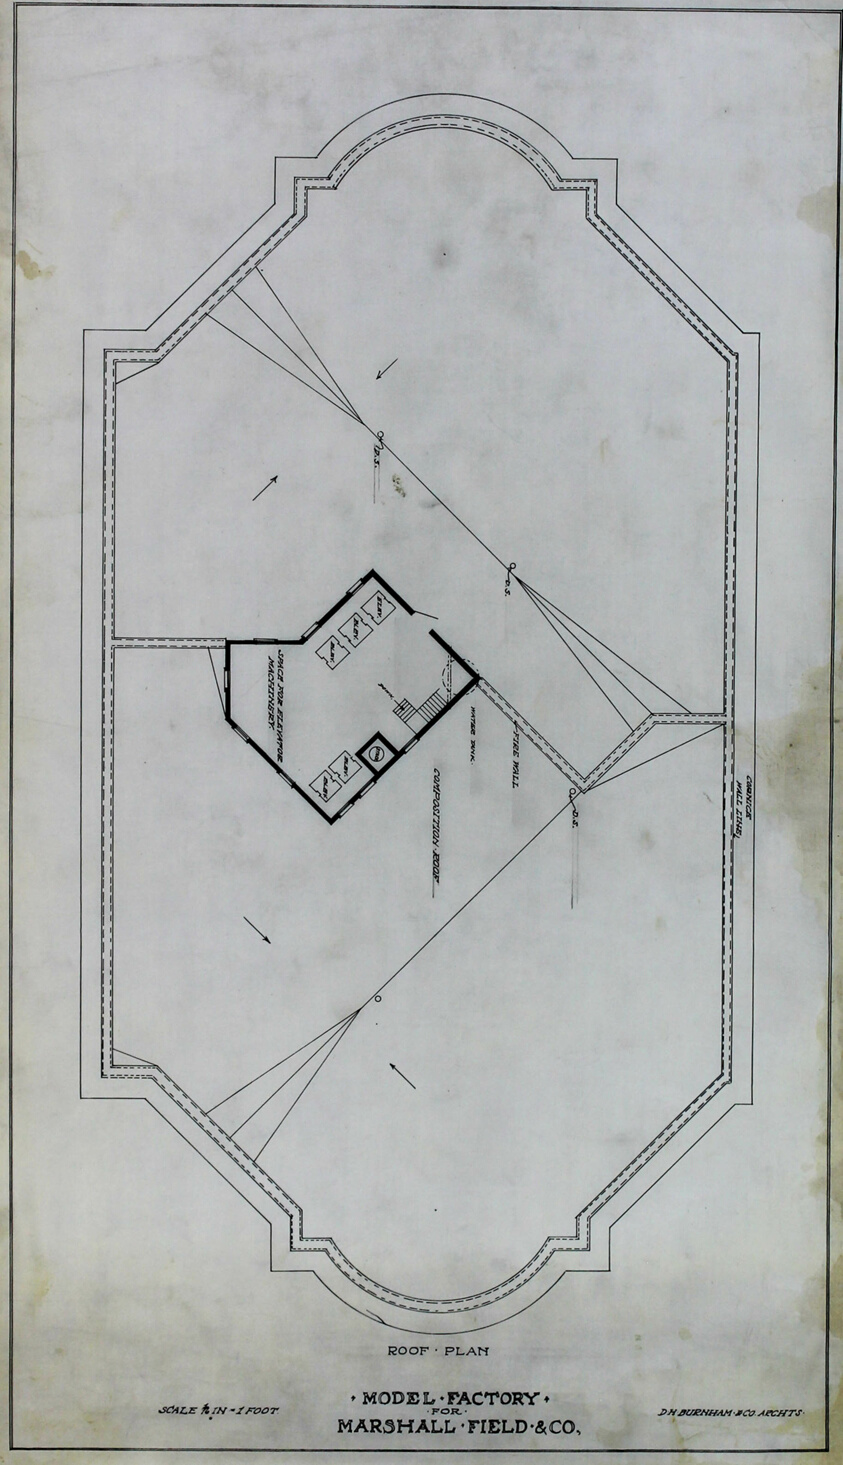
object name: Architectural Drawing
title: Marshall Field & Company Model Factory, Chicago, Illinois, Roof Plan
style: 19th century, 20th Century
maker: D. H. Burnham & Co.; American, 1896–1912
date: c. 1900–1905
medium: Black and red ink on linen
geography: Chicago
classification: architectural drawing; architecture; design drawing; plan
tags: Chicago, office buildings, plan, urban planning